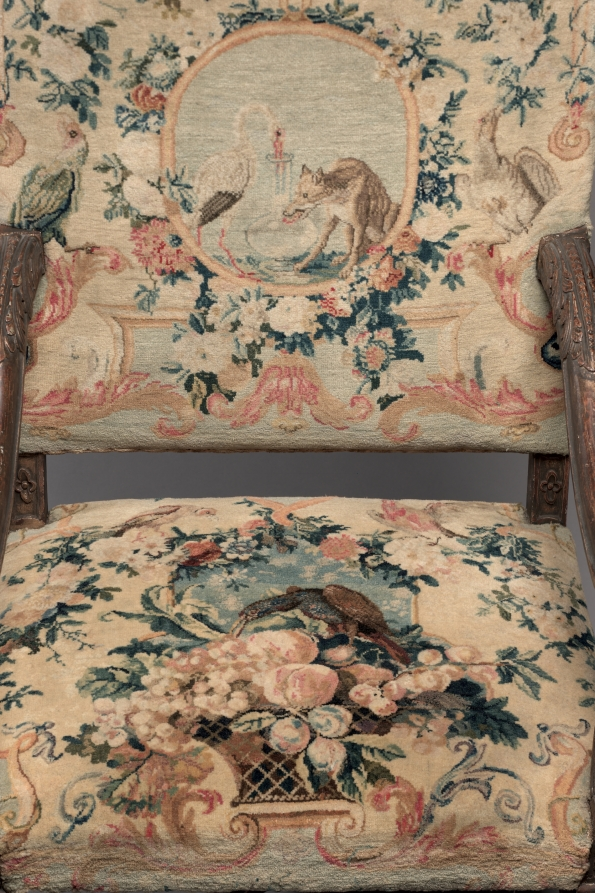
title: Armchair (4 of 4)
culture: France, 18th century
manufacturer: Royal Savonnerie Manufactory, Chaillot Workshops (French, est. 1627)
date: before 1717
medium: carved wood, Savonnerie knotted-pile (symmertrical rug knot) upholstery; wool, hemp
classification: Furniture and woodwork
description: These chairs belong to a suite that includes a settee (also in the CMA’s collection) and a tapestry made for a count and countess to mark their wedding in 1717. Furniture of this scale was usually placed against the wall in grand reception halls, more as a display of wealth than for use. Upholstered in Savonnerie tapestries, this suite was among the most treasured and expensive example anyone could own and typically reserved for royalty. To add decorative and intellectual interest to the textiles, weavers incorporated symbols depicting various stories from the Fables of Jean de La Fontaine, published from 1668 to 1694 and largely adapted from Aesop and other early storytellers.